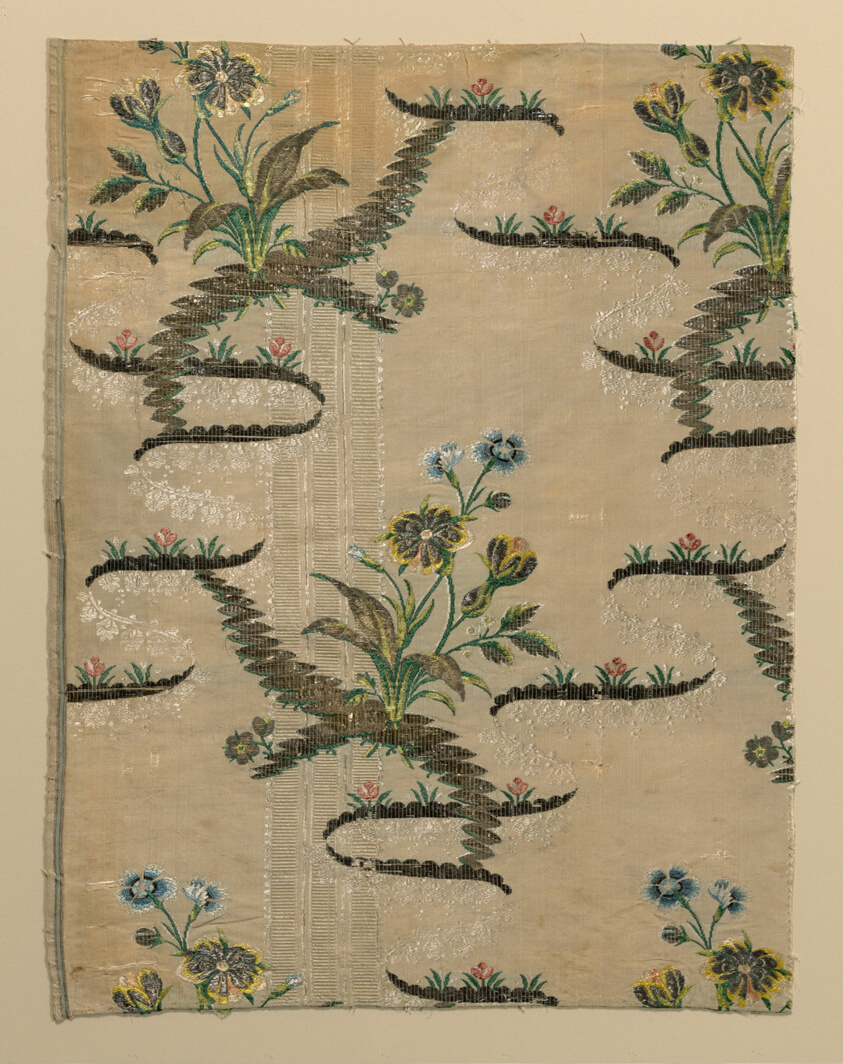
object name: Textile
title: Fragment (Dress Fabric)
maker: England, Spitalfields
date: 1750/55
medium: Silk, gilt-and-silvered-metal strips, and gilt-and-silvered-metal-strip-wrapped silk, plain weave with supplementary patterning warps, supplementary patterning wefts, and supplementary brocading wefts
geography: England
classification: textile; weaving